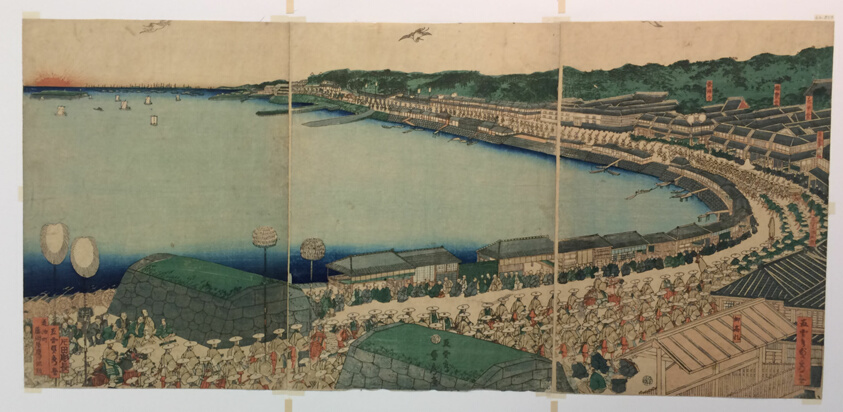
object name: Print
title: Daimyo's Processions Passing along the Tokaido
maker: Utagawa Sadahide (Japanese, 1807-1873)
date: 1807–1873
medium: Color woodblock print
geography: Japan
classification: woodblock print; print; asian art